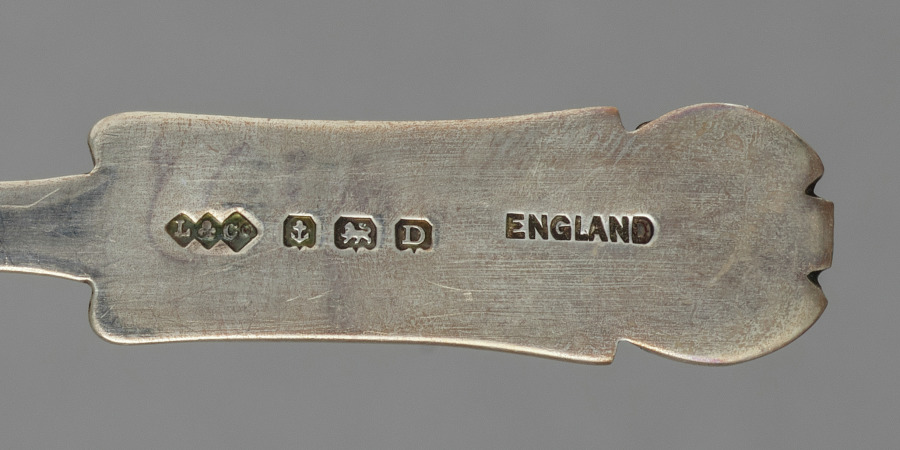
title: Set of six Spoons in Original Box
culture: England, London, 19th century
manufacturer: Liberty and Company (British)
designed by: attributed to Archibald Knox (British, 1864–1933)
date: c. 1895–1910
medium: Silver, enamel decoration and leather box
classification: Silver